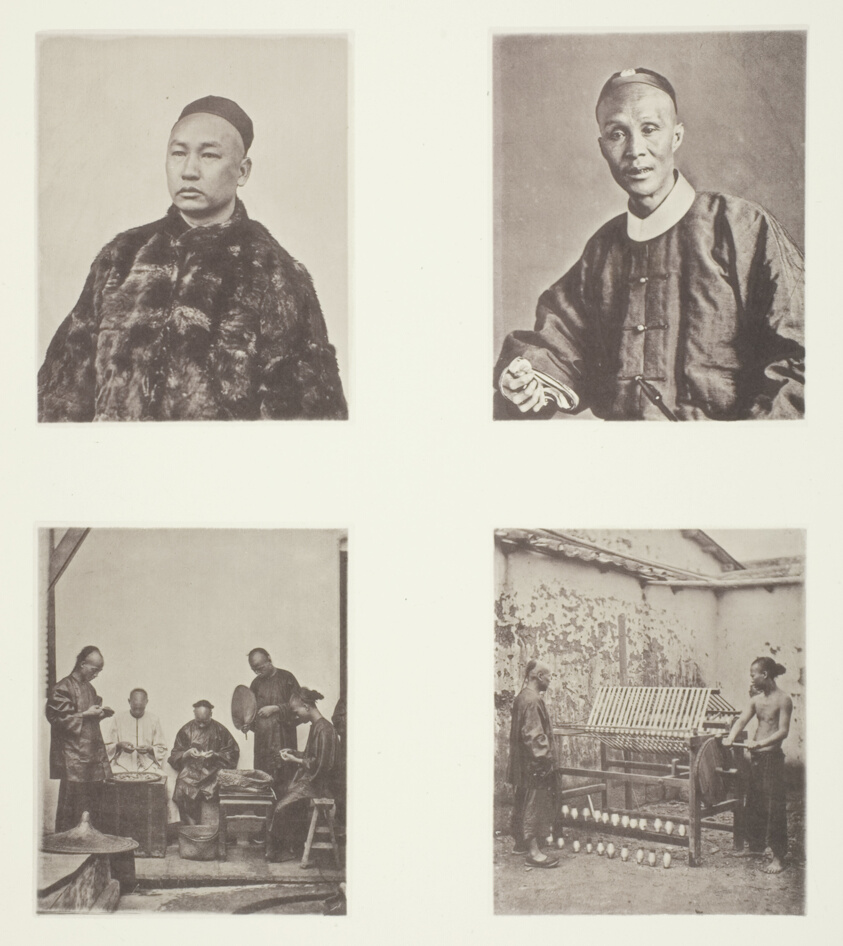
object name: Photograph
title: A Cantonese Gentleman; A Cantonese Gentleman; Schroffing Dollars; Reeling Silk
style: 19th century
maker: John Thomson (Scottish, 1837–1921)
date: c. 1868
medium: Collotype, pl. XXII from the album "Illustrations of China and its People, Volume I" (1873)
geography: Scotland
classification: photography; photograph